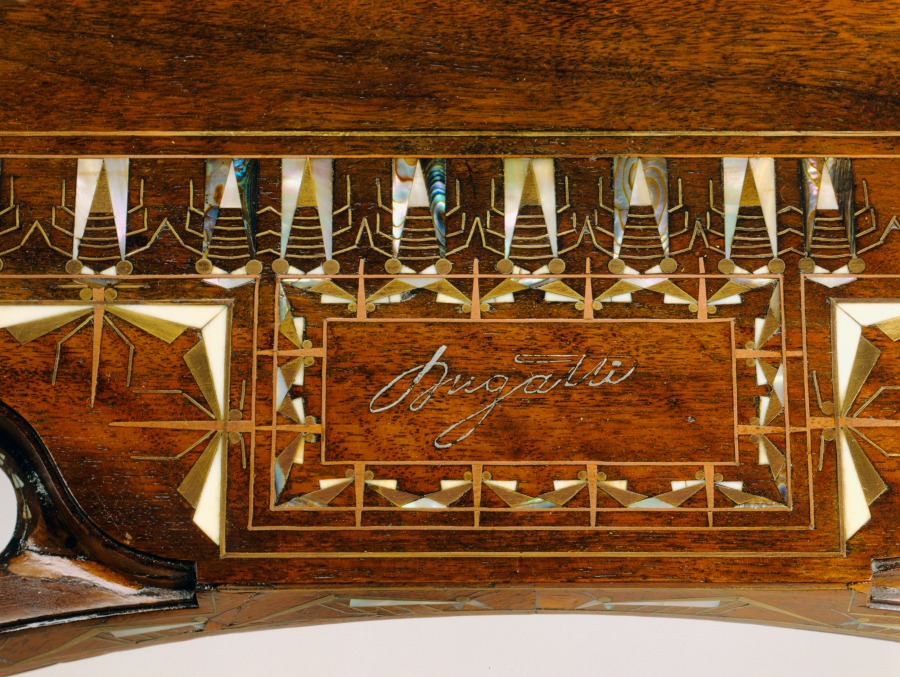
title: Tea Table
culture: France, Paris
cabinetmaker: Carlo Bugatti (Italian, 1856–1940)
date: c. 1907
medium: inlaid wood (mahogany?), cast and gilded bronze mounts, inlays of ivory or bone, metal, and mother-of-pearl (marine mussels or pearl oysters)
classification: Furniture and woodwork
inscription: signed in ligature in white metal inlay on central shelf: Bugatti.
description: Luxurious materials might catch the eye first, but a closer look reveals the imaginary creatures that adorn the surface of this table. Featuring elaborate arches, a favorite motif that appeared throughout Bugatti's furniture, this fantastical imagery is a window into the designer's expressive imagination.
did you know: Carlo Bugatti's sons achieved illustrious careers of their own. Rembrandt Bugatti (1884-1916) became a celebrated sculptor, and Ettore Bugatti (1881-1947) manufactured luxurious automobiles and racing cars.